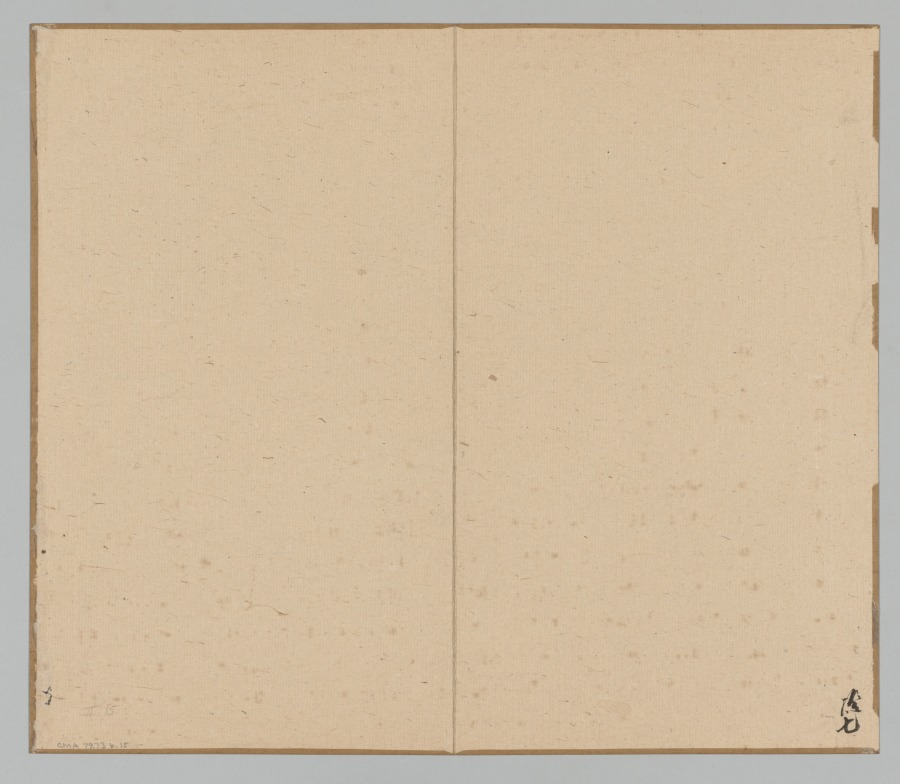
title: Reverberations of Taiga, Volume 2 (leaf 15)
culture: Japan, Edo period (1615–1868)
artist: Aoki Shukuya (Japanese, d. 1802)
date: mid- to late 1700s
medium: double-leaf from a pair of albums; ink and light color on paper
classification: Portfolio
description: Traditionally, young painters in Japan began their studies with an established master-painter. The master's compositions invariably became models that the apprentice copied to learn various ink and brush techniques. Shukuya was a pupil of the famous Kyoto artist Ikeno Taiga, whose style is reflected in these sketches of rocks, trees, and mountains.